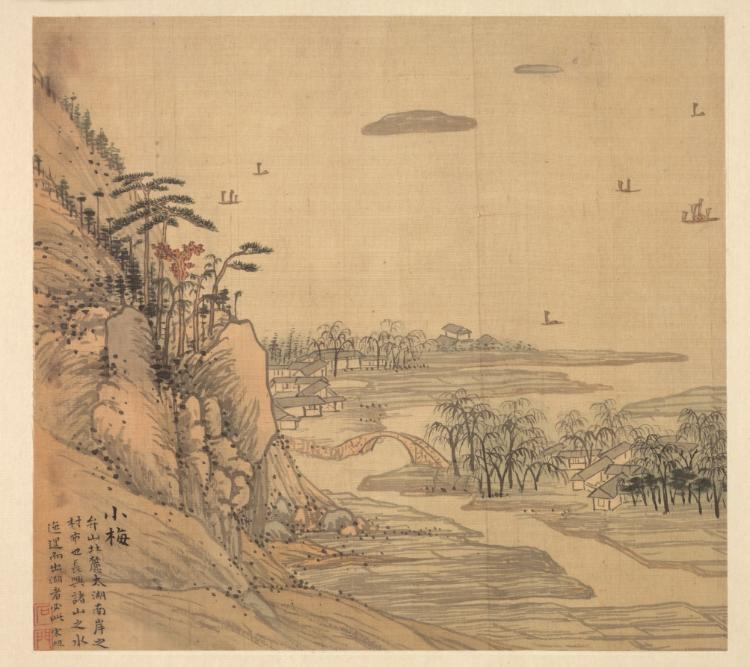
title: Xiaomei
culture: China, Jiaxing, Ming dynasty (1368–1644)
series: Eighteen Views of Huzhou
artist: Song Xu (Chinese, 1525-c. 1606)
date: c. 1588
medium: Album leaf; ink and color on silk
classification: Painting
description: By the 1500s, visits to historic and scenic sites in the lower Yangzi delta stimulated an increase of printed illustrated travel books. Topographical depictions of local scenery flourished. Leaves from this album illustrates sites around Lake Tai of the two adjacent counties Changxing and Wuxing (modern Huzhou). Song Xu, who lived intermittently in Jiaxing and Songjiang, must have passed through Wuxing by boat and thus knew the region. The paintings are inscribed with gazetteerlike notations, suggesting that the album was produced for clients as commemorative works, a travel guide, or for “armchair travel” (woyou) in one’s mind.